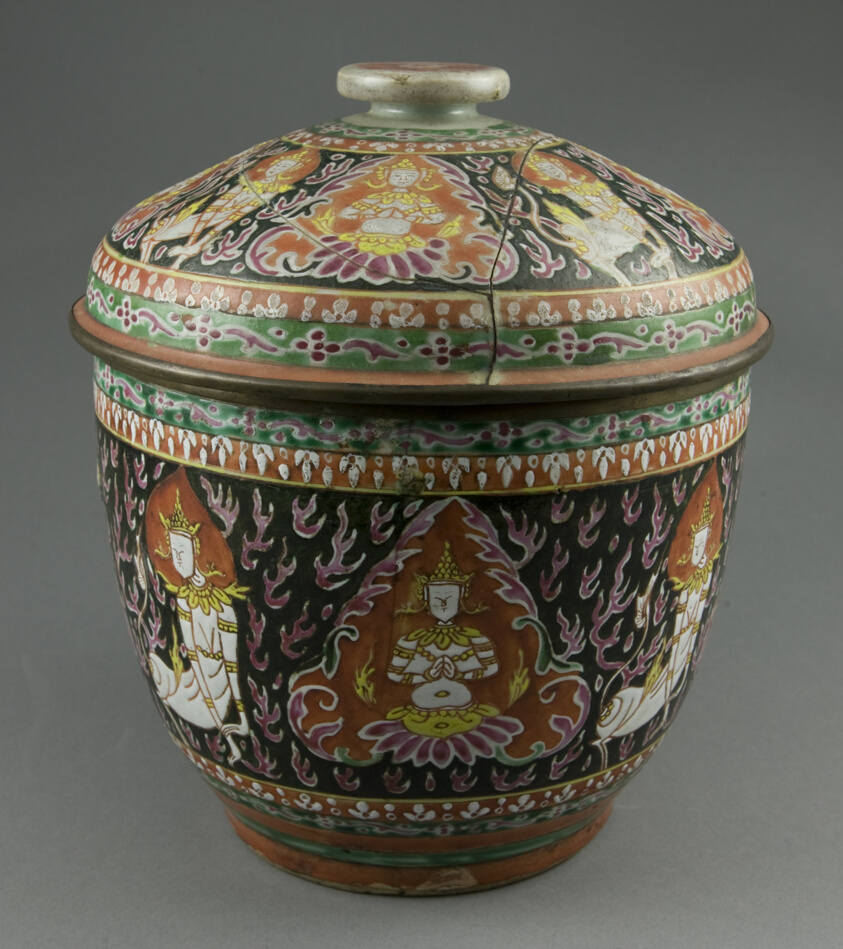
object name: Decorative Arts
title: Bencharong (Five-Colored) Ware, Covered Jar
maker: China, for the Thai Market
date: 19th century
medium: Porcelain painted in overglaze polychrome enamels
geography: China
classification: porcelain; asian art; ceramics; decorative arts